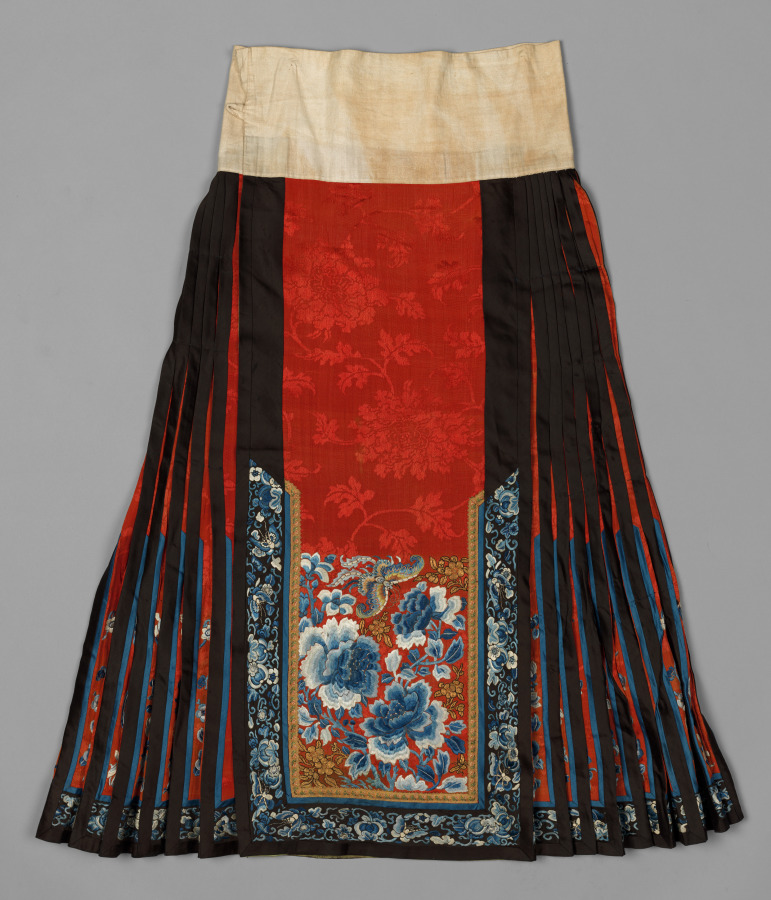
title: Skirt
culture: China, Qing dynasty (1644-1911)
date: 1800s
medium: Silk and gold thread: embroidery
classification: Garment